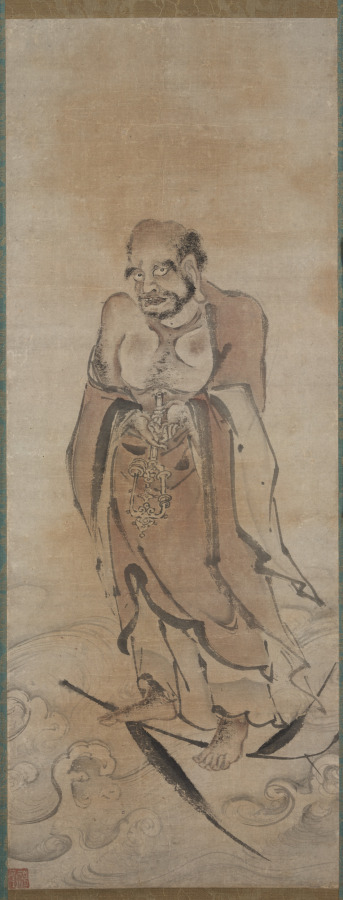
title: Bodhidharma on a Reed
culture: Japan, Muromachi period (1392–1573)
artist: Shingo (Japanese)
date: 1500s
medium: hanging scroll; ink and light color on paper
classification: Painting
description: Bodhidharma (Daruma in Japanese) is the founder of the Zen school of Buddhism. He is usually represented as a bearded figure whose dark-skinned appearance refers to his Indian ancestry. His scowling facial expression not only signifies the determination with which he pursues religious enlightenment, but also discourages followers who are not similarly motivated. Zen Buddhism emphasizes the importance of seeking enlightenment directly through meditation, without reliance on the written word.